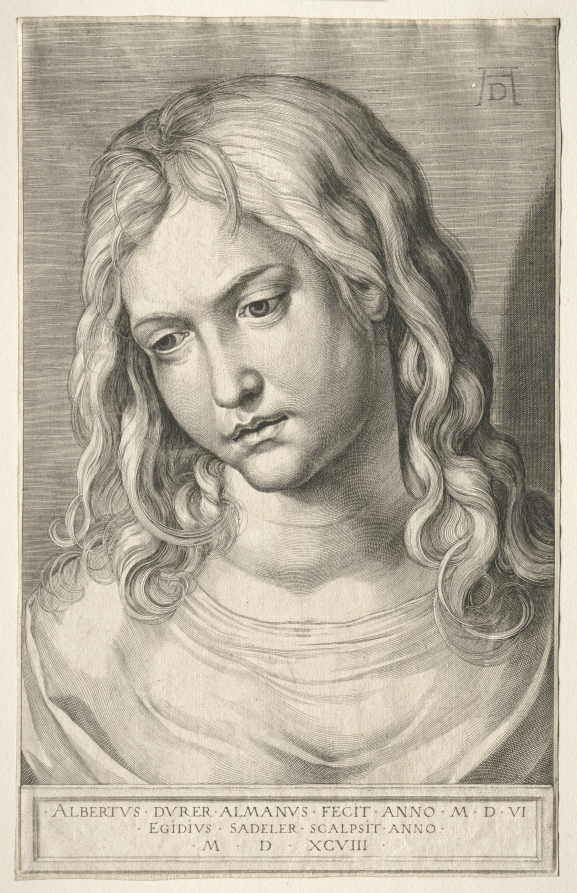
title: Head of the Young Christ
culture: Flanders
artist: Aegidius Sadeler (Flemish, c. 1570–1629)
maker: after Albrecht Dürer (German, 1471–1528)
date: 1598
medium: engraving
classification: Print